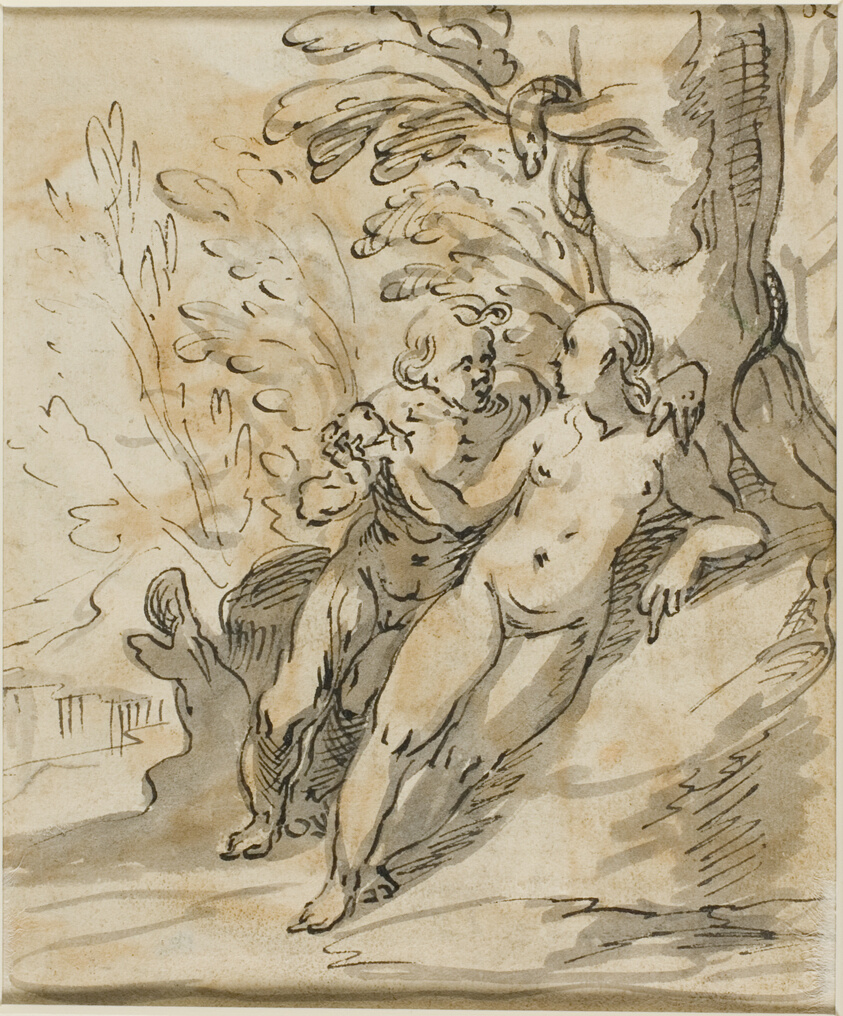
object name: Drawing and Watercolor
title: Adam and Eve Under a Tree (recto); Two Men in Dispute (verso)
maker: Hermann Weyer (German, c. 1596-1621)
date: 1610/20 (recto); 1616/21 (verso)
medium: Pen and black ink, with brush and gray and brown wash, heightened with white gouache, on cream laid paper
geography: Germany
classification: pen and ink drawings; drawings (visual works); prints and drawing